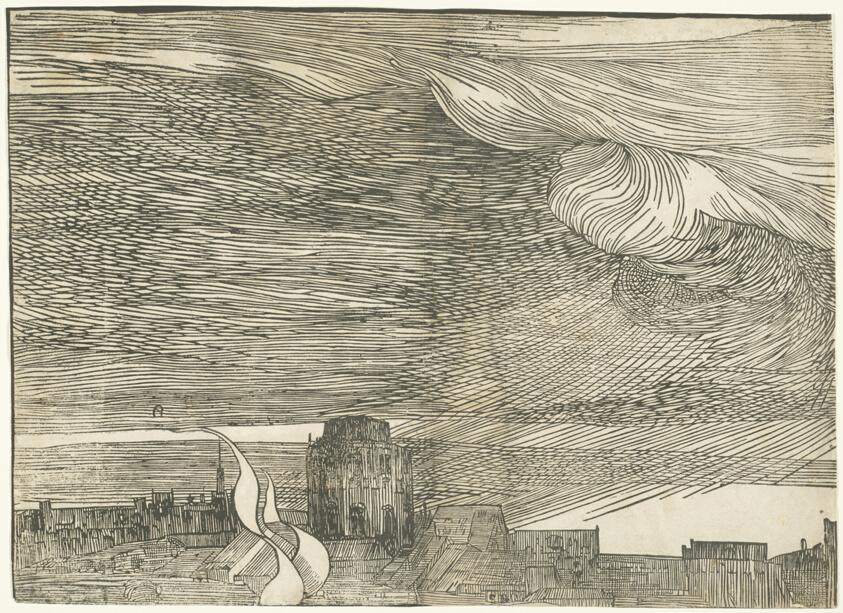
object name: Print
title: The Submersion of Pharaoh's Army in the Red Sea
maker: After Titian (Italian, c. 1488-1576); published by Domenico dalle Greche (Italian, active 1543-1558)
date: c. 1515, printed 1549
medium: Woodcut in black on ivory laid paper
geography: Italy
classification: woodcut; print; prints and drawing